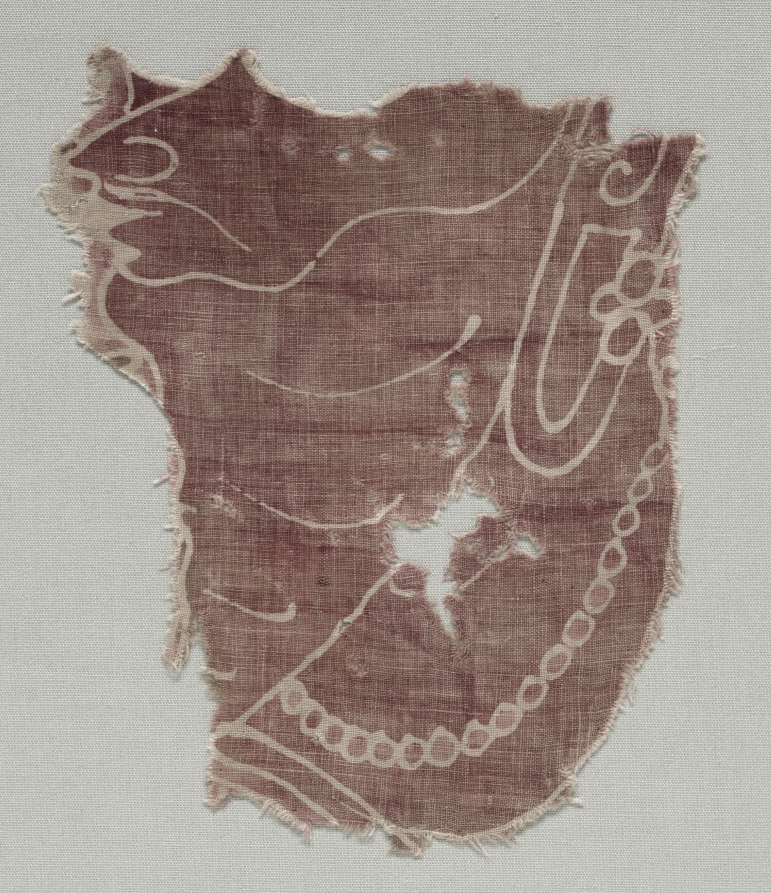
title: Fragment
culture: India, 12th-14th century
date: 1100s-1300s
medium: plain cloth, resist dyed; cotton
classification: Textile